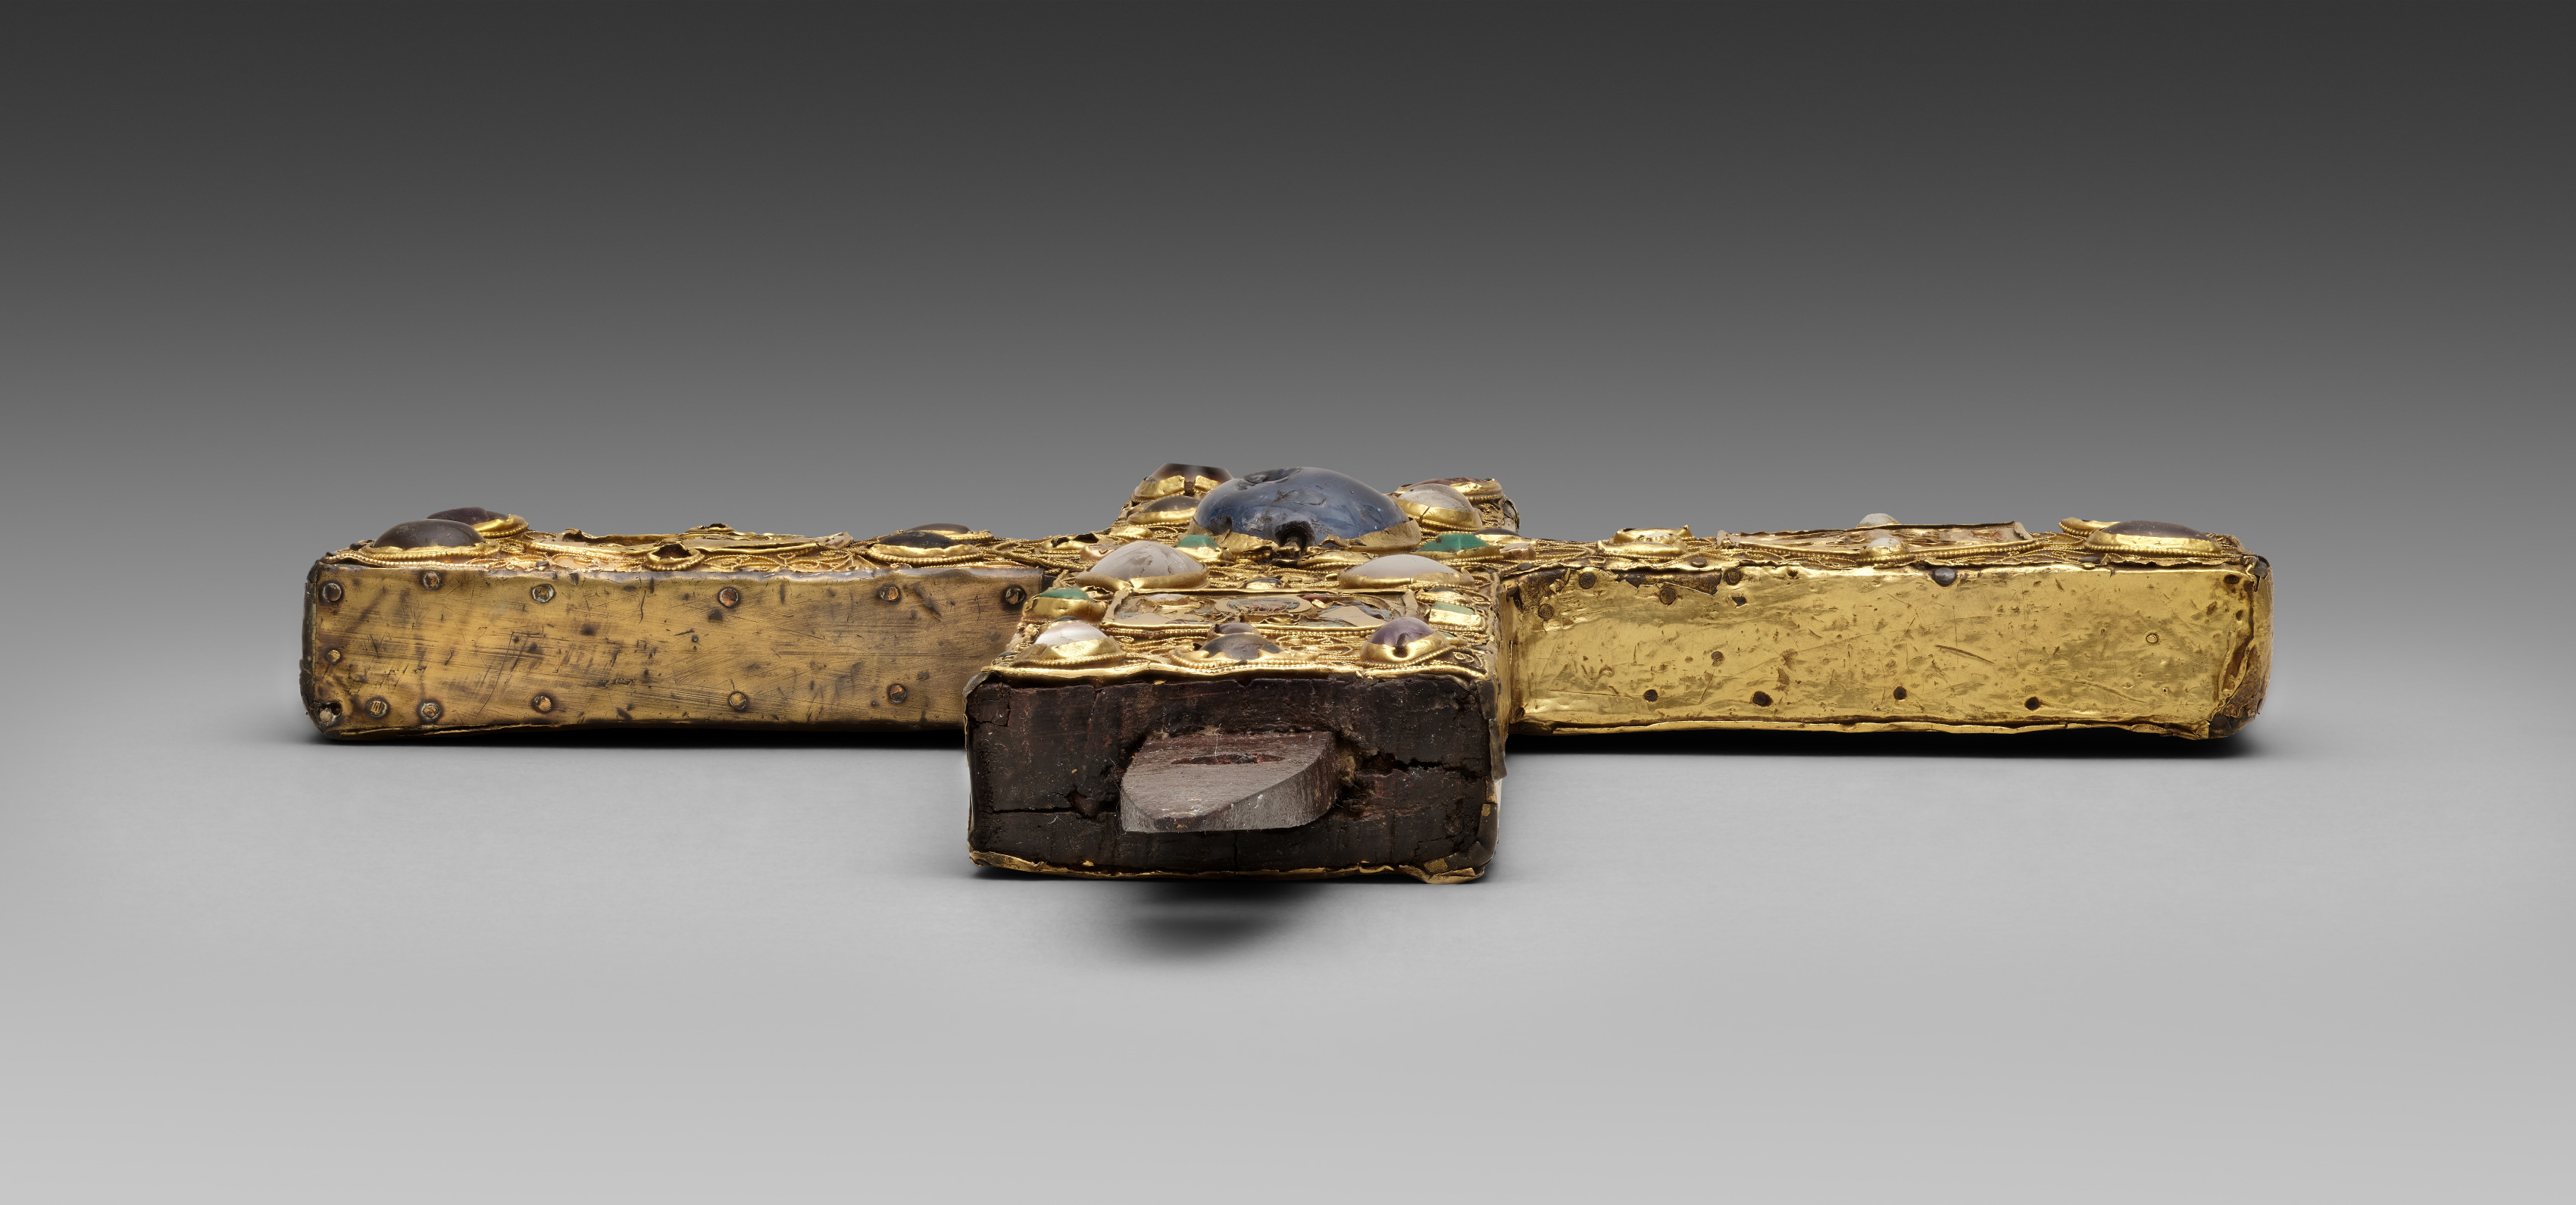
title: Ceremonial Cross of Countess Gertrude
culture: Germany, Lower Saxony?, 11th century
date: 1038 or shortly after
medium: gold: worked in repoussé; cloisonné enamel, intaglio gems, pearls, wood core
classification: Metalwork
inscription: translation of inscription on back: For the Relics of the Holy Apostle Peter and the Holy Virgin Liutrudis, Countess Gertrude Ordered this made.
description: This precious gold cross was commissioned by Countess Gertrude (died 1077) and given to the church of Saint Blaise following the death of her husband, Count Liudolf of Brunswick (died 1038). The cross was intended to be carried in liturgical processions or to be placed on a church altar. The inclusion of relics within the crosses endowed them with an additional role as devotional objects. At the center of the four cross arms, fine but much damaged cloisonné enamel plaques represent the symbols of the four Evangelists--an eagle for Saint John (above); a lion for Saint Mark (on the left); an ox for Saint Luke (on the right); and an angel for Saint Matthew (below). Pearls and precious and semiprecious stones are set within an intricate network of gold filigree while a large sapphire, inscribed in a circle and likewise surrounded by pearls and precious stones, is placed at the crossing.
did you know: Countess Gertrude's name appears on the back of the cross at the bottom.